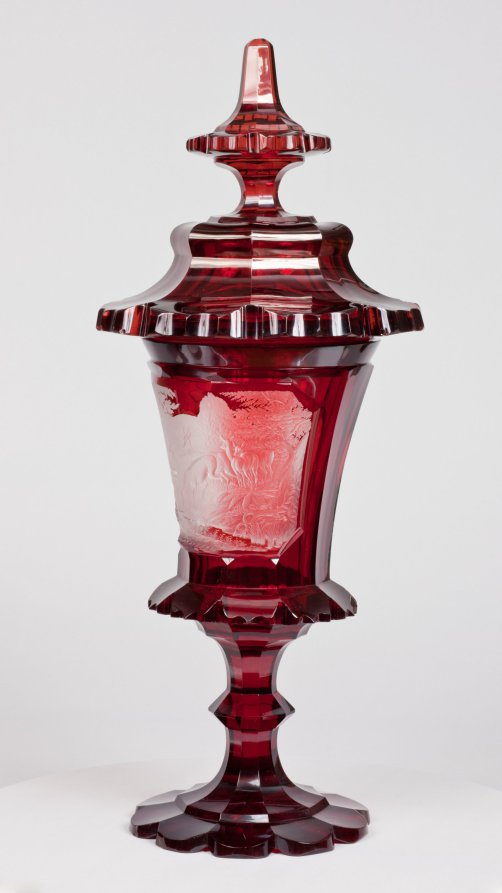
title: Covered Cup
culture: Bohemia, 19th century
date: mid-1800s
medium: ruby glass with engraved decoration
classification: Glass